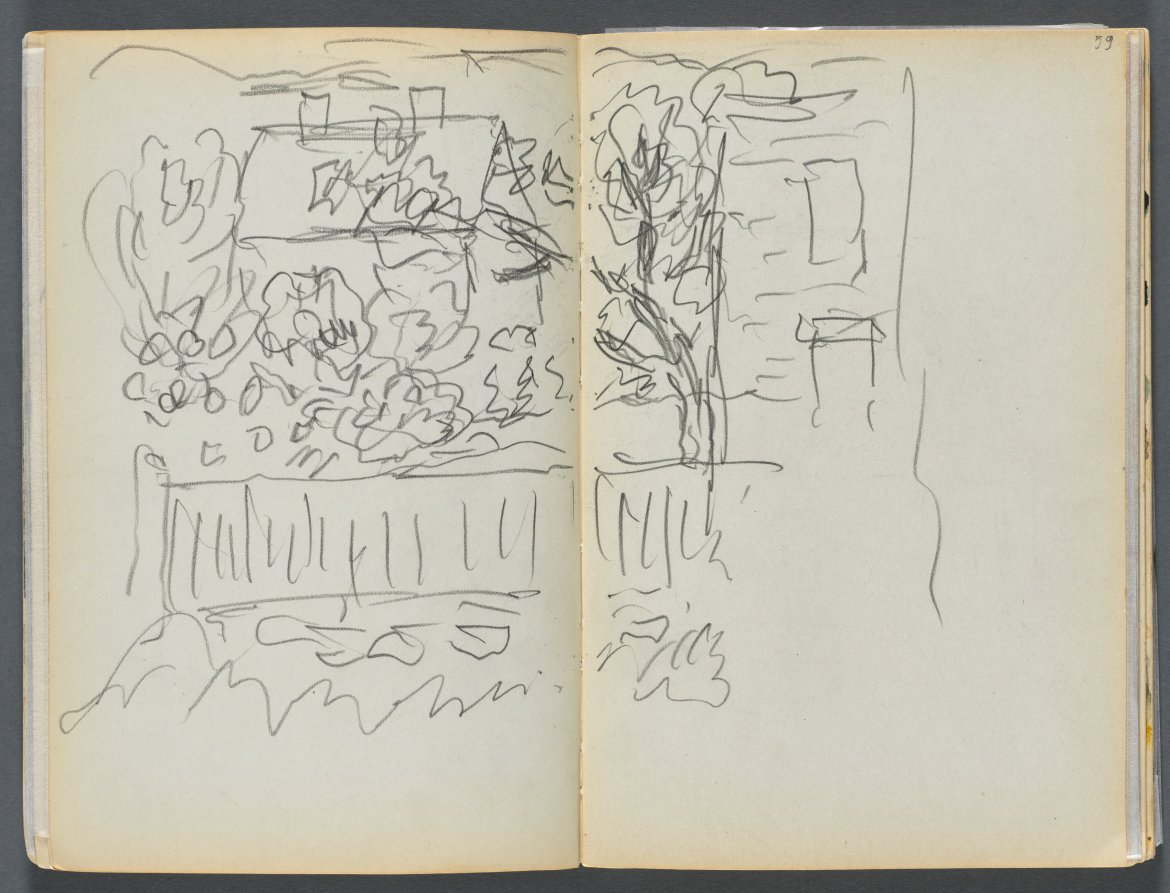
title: Sketchbook- The Granite Shore Hotel, Rockport, page 058 & 59: House and Fenced Garden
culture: America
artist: Maurice Prendergast (American, born Newfoundland [now Canada], 1858–1924)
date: 1905–10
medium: graphite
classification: Bound Volume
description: This sketchbook contains 72 pages of pencil drawings and 9 watercolors of Cape Ann. On the inside of the cover Prendergast wrote the address of the Granite Shore Hotel in Rockport, Massachusetts.